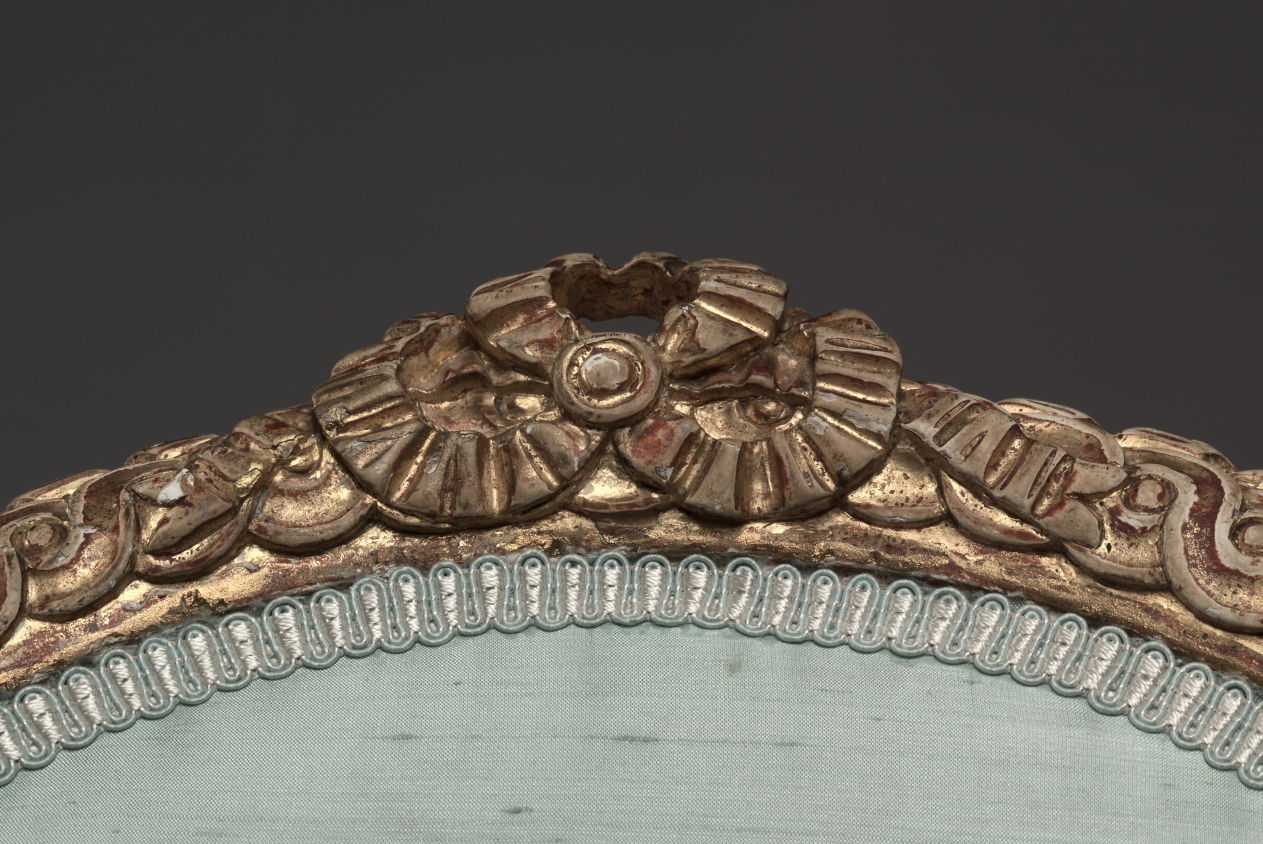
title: Side Chair (1 of 2)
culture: France, style of Louis XVI, 18th century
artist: Jean Baptiste fils Lelarge (French, 1743–1802)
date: 1700s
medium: gilded wood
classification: Furniture and woodwork